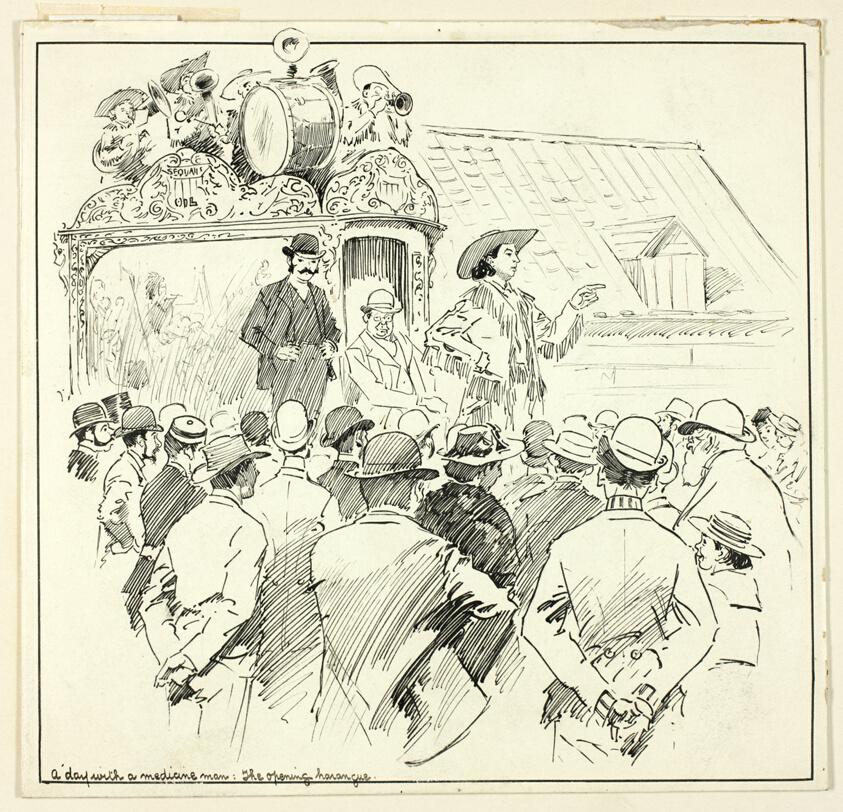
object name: Drawing and Watercolor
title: A Day with the Medicine Man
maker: Philipp William May; English, 1864-1903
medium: Pen and brown ink over traces of graphite on ivory wove card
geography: England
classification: pen and ink drawings; drawings (visual works); prints and drawing